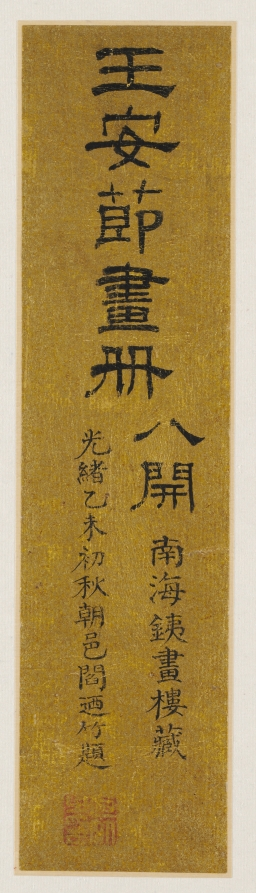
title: Album of Landscapes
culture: China, Qing dynasty (1644–1911)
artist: Wang Gai (Chinese, active c. 1677–1705)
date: 1677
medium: Album of eight leaves; ink or ink and light color on paper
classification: Painting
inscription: Artist's inscription, signature, and seal on leaf 4: In imitation of [T'ang] Wang Hsia's use of ink. Wang Gai of Hsiu-shui [seal] Gai; Artist's poem, signature and seal on leaf 7; Artist's poem, signature, and 2 seals on leaf 8. 8 colophons and 24 additional seals: 1 colophon and 2 seals of Shih Jun-chang (1618-1683); 1 colophon and 3 seals of Wang Shih-chen (1634-1711); 1 colophon and 2 seals of Li Lai-t'ai (dates unknown); 1 colophon and 3 seals of Mi Han-wen (1661 'chin-shih'); 1 colophon and 3 seals of Tai Wang-chin (17th c.); 2 colophons and 6 seals of Tai Wang-lun (1655 'chin-shih'); 1 colophon and 2 seals of Wang Wan (1624-1690); 1 seal of Chang Yin-huan (1837-1900); 2 seals unidentified. Artist's inscription, signature, and seal on leaf E: In imitation of [T'ang] Wang Hsia's use of ink. Wang Kai of Hsiu-shui [seal] Kai. Artist's poem, signature, and seal on leaf G: At an empty window sucking on a brush, the autumn water nearby, Green are the rushes, and bamboo reach to the sky. For those who love hibiscus, river moonlight is best; In this tiny shelter I keep company with sleeping egrets. Wang Kai [seal] Wang yin Kai. Artist's poem, signature, and 2 seals on leaf H: The waters of the Hsün-yang River flow around the town [Chiu-chiang in Chianghsi Province]; Yü Liang [Western Chin Dynasty general and statesman] once made a night excursion here. The air was fresh and cool - it must have been the eighth month; That noble gathering would still be known a thousand years thereafter. In the tantalizing ways we feast there is no difference, past or present, Lofty and pre-eminent talent still overflows in the exchange of verses, Tall and large pavilions all share in good writing. Joy winging through the air is no less than that in the Southern Tower. [The Southern Tower, in Nanch'ang, Hupei Province, was where Yü Liang spent an evening with friends and contemporaries exchanging poetry and ideas.] In the mid-autumn of the ting-ssu year [1677], these paintings and comments are presented to the venerable MengWeng, leader of the literary circle, for criticism. Wang Kai of Hsiu-shui [seals] Wang yin Kai; An-chieh. 8 colophons and 24 additional seals: 1 colophon and 2 seals of Shih Jun-chang (1618-1683); 1 colophon and 3 seals of Wang Shih-chen (1634-1711); 1 colophon and 2 seals of Li Lai-t'ai (dates unknown); 1 colophon and 3 seals of Mi Han-wen (1661 chin-shih); 1 colophon and 3 seals of Tai Wang-chin (17th c.); 2 colophons and 6 seals of Tai Wang-lun (1655 chin-shih); 1 colophon and 2 seals of Wang Wan (1624-1690); 1 seal of Chang Ym-huan (1837-1900); 2 seals unidentified. A. Poem by Shih Jun-chang: Trees enmeshed in clouds darken the river ferry; So grand a scene could only belong to the season of late spring. Looking upon the Five Lakes, fishermen are few, You don't know who the oarsman is. Random comment for the venerable Meng Chih-weng to correct. Shih Jun-chang. B. Poem by Wang Shih-chen: A valley stream winds around a hermit's home, Over dark bamboo and yellow reeds leans one corner of the house. Watching the wake of a fishing boat off somewhere, The ripples in the water are like wild geese nesting in the sand. Inscribed for Meng Weng by his junior, Wang Shih-chen. C. Poem by Li Lai-t'ai: A small bridge merged with clouds crosses the distant water, A few rosy clouds and autumn colors trim the clear river. I stand alone at leisure in empty mists; The mountains' verdant sides and misty peaks face the small window. Inscribed for venerable Mr. Meng Weng, Li Lai-t'ao. D. Poem by Mi Han-wen: Coming and going time after time, The front pavilion rests upon a great river. Distant sails, the spring waters broad, A tall temple, the afternoon sun strong. Beneath the shadow of a butterfly, red peonies, Amidst the chatter of birds, green vines. Unable yet to return to the old mountains, In vain I hum the "Picking ling-chih" song. Written for Meng Lao, Mi Han-wen. [The last two lines refer to the Four Old Recluses of Mount Shang who lived during the Ch'in Dynasty [221-206 BC], and the song they sang about picking ling-chih, the mushroom-like growth thought to produce immortality.] E. Poem by Tai Wang-chin: Who picks up his unrestrained brush to write down misty peaks? To gaze at mountains from an empty house is a pleasure inexhaustible. I even wish I were physically within a painting. Where floating clouds are not depicted, but only a vast sea of waves. Written for the comments of Mr. Meng Weng, your junior associate, Tai Wang-chin. F. Poem by Tai Wang-lun: Splashed ink, dripping wet, cannot be restrained Smartweed flowers are boundless, the water flowing long. The old fisherman moves his oar leisurely back and forth, In ten thousand valleys and a thousand peaks, the air is filled with fall. Written on one of the paintings for the venerable Meng Weng, Tai Wang-lun of Ts'ang-chou. G. Poem by Tai Wang-lun: Precipitous slopes, distant peaks, and trees with forking branches, Set apart are village huts for two or three households. In one of them a recluse expounds from a book on the Tao, Burning incense, alone he sits to chant the Nan-hua [Chuang-tzu]. Written on a second painting for the venerable Meng Ch'i, Tai Wang-lun of Ts'ang-chou. H. Poem by Wang Wan: Clouds like a landslide cover the boundless sky; Year-round howling, the direction of the wind is ominous. The boom has just been lowered with a hundred feet of sail; Yet you can predict the violent wind from the direction of flying pennon tails. Reed blossoms fly in disarray, their leaves badly battered; Yangtze porpoises blow upon the waves, producing wild ripples. You people of the land, don't sing about the joys of the trader, Winds and waves like these will make their journey treacherous. Written for venerable Meng Weng, your junior friend from Yao-fen, Wang Wan. trans. HK/LYSL